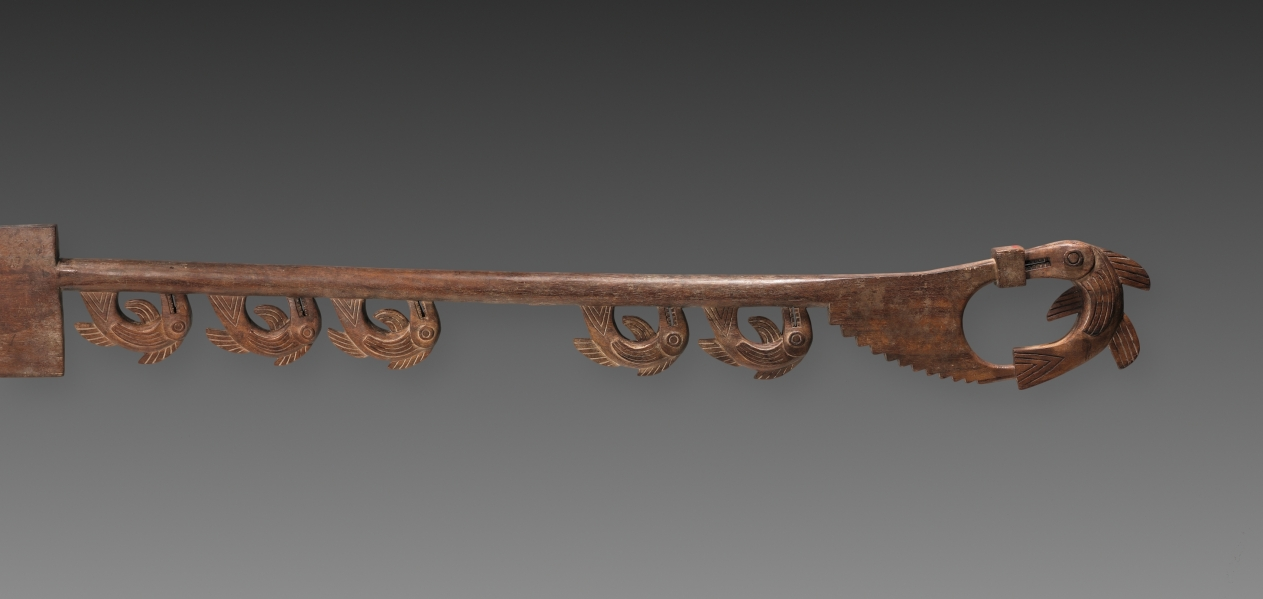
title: Carved Board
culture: Peru, South Coast, Ica Valley, 15th-16th century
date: 1400s-1500s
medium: wood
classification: Sculpture